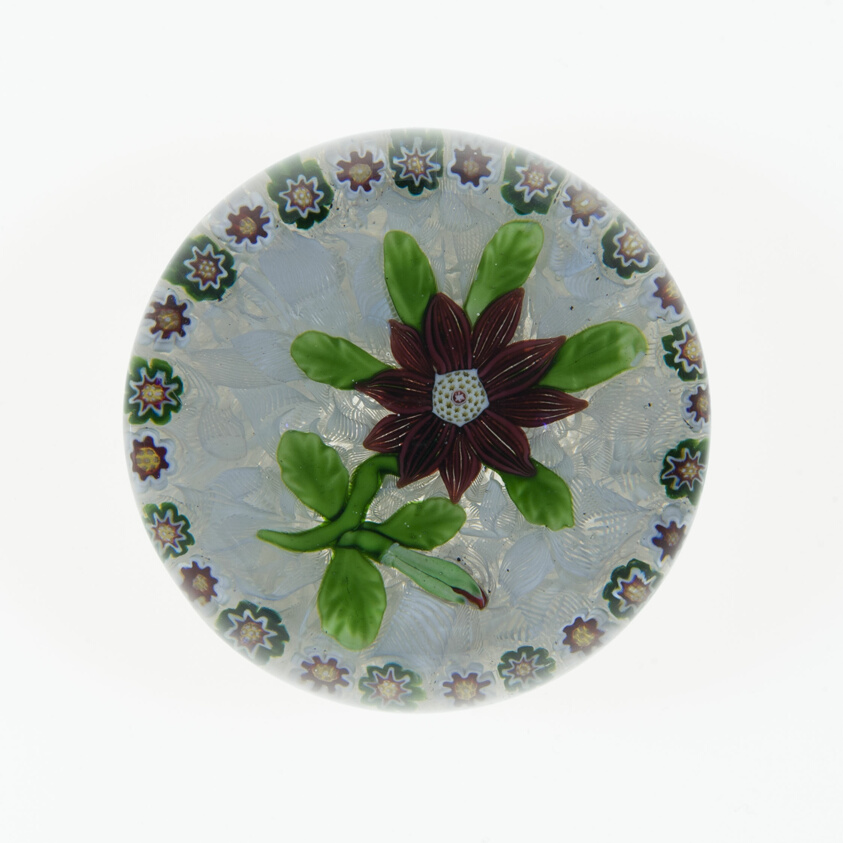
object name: Glass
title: Paperweight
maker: Baccarat Glassworks (Cristalleries de Baccarat); Lorraine, France, founded 1764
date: c. 1848–55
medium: Glass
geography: Lunéville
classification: paperweight; lampwork; european decorative arts; glass